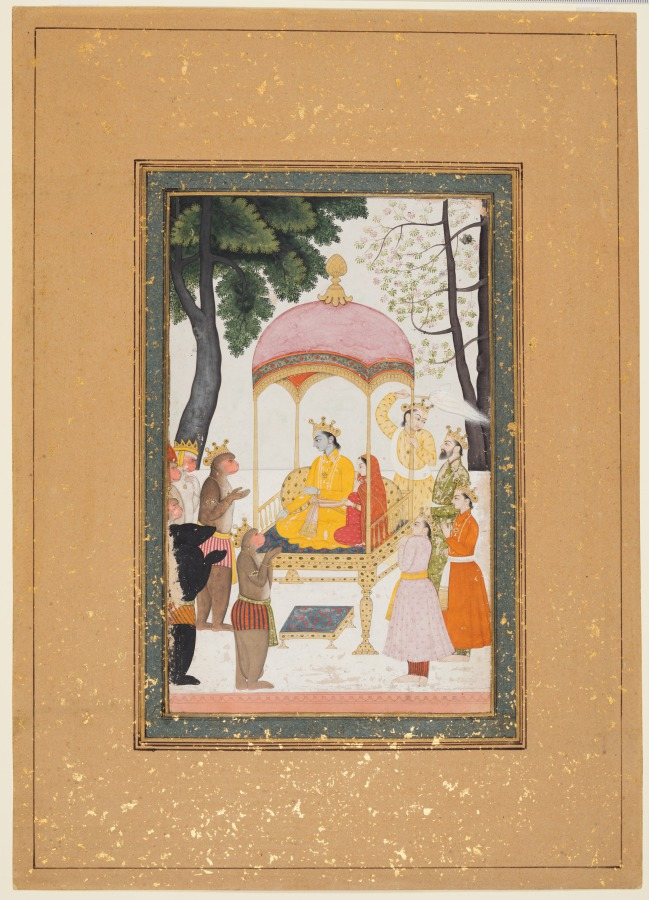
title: Enthroned Rama and Sita receive homage from their monkey and bear Allies, from the Yuddha Kanda (Book of the War) of a Ramayana (Rama’s Journey)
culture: Northern India, Pahari kingdoms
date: c. 1765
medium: gum tempera and gold on paper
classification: Painting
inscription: [[verso, upper center, in English, four lines]] Lord Rama + with his wife Sitā sitting his throne after coming back from (forest) + (forest) king monkey + (here) showing his (sumptuary)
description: This scene is set at the end of the Hindu epic Ramayana, after Rama returns from 14 years of exile in the forest. During Rama’s time of exile, Ravana abducted Rama’s wife Sita. Rama gathered an army of monkeys and bears, and rescued Sita. The chiefs of the monkey and bear armies pay their respects to the reunited royal couple.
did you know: Rama’s three brothers can be seen at the right side of the painting.